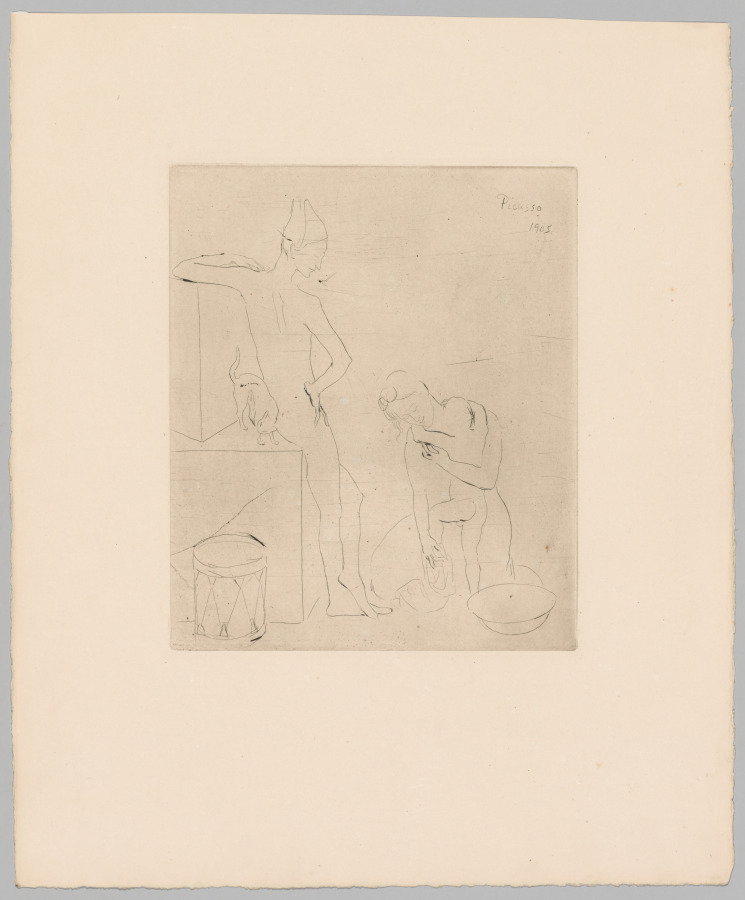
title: The Bath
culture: Spain, 20th century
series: The Saltimbanques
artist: Pablo Picasso (Spanish, 1881–1973)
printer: Louis Fort (French, active 1800s–1900s)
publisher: Ambroise Vollard (French, 1867–1939)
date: 1905, printed 1913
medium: drypoint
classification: Print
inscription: Signed, upper right, in plate: Picasso / 1905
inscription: Watermark: VAN GELDER ZONEN